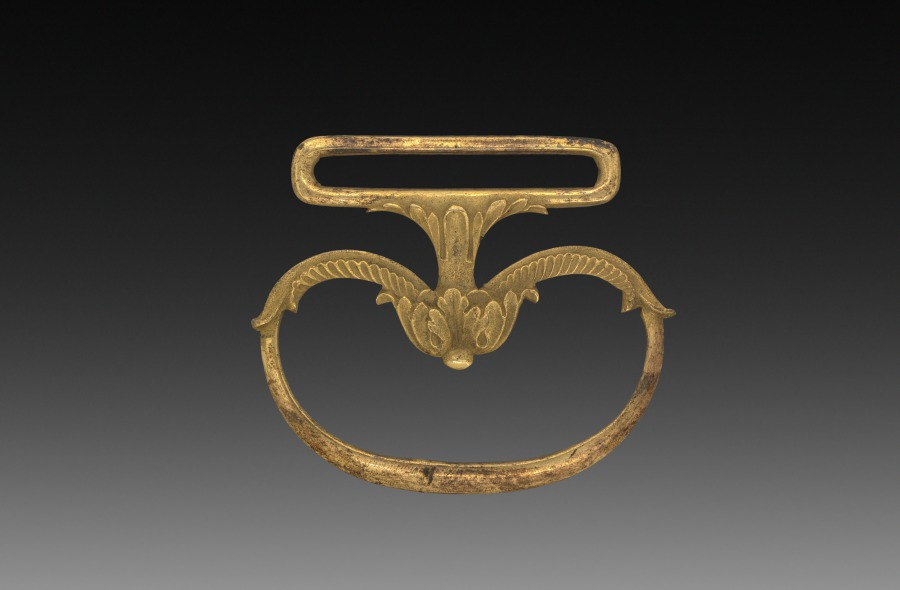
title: Bell Pull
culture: France, late 18th century, style of Louis XVI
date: late 1700s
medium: gilt bronze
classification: Metalwork